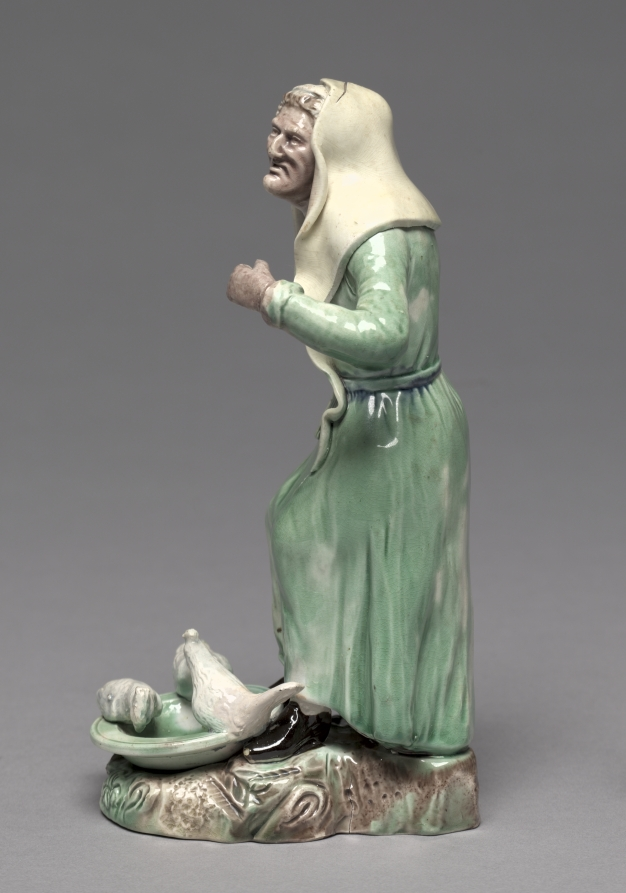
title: Old Woman Feeding Chickens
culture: England, Staffordshire, 18th century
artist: Staffordshire Factory (British)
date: c. 1770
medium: earthenware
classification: Ceramic